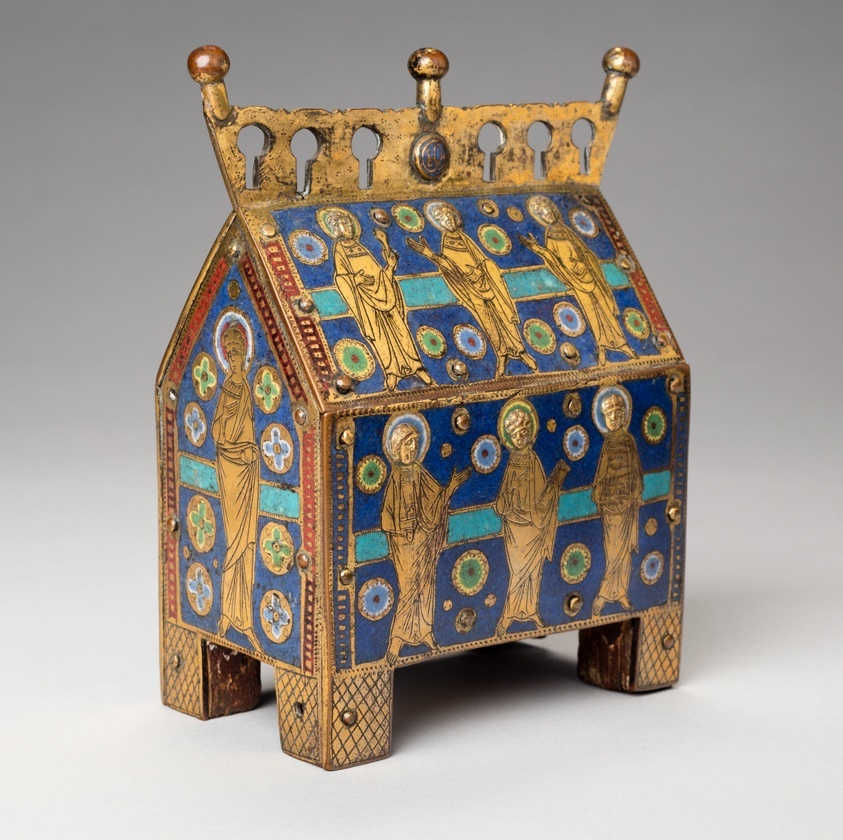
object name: Metalwork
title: Reliquary Casket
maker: French; Limoges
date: c. 1200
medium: Gilt copper, champlevé enamel over wood core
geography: Limoges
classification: enamel; european decorative arts; decorative arts; reliquary; religious